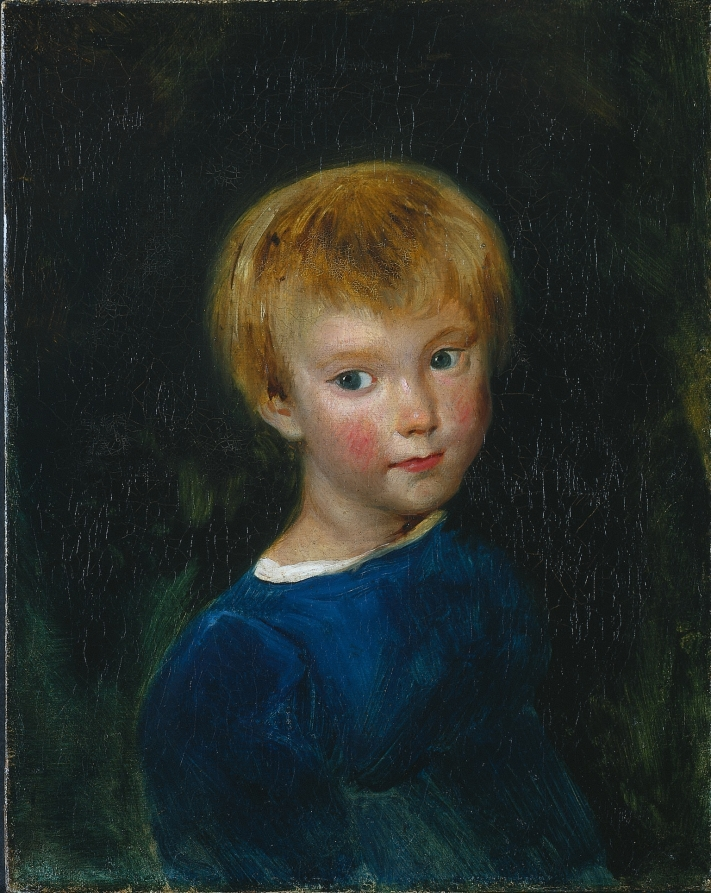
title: Marguerite-Juliette Pierret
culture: France, 19th century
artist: Eugène Delacroix (French, 1798–1863)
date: c. 1827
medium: oil on fabric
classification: Painting